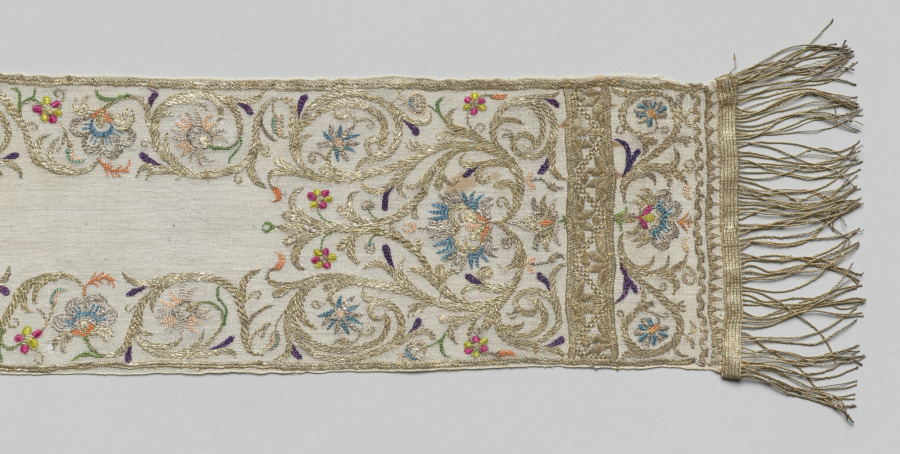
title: Headdress (beniqa)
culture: Africa, North Africa, Algeria, Algerian embroiderer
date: 1800s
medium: Linen, silk, and metal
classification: Embroidery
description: Beniqa were stylish headdresses that women wore when visiting the hammam (steam bath). The linen fabric absorbed the damp from their wet hair. With its gold and silver metal thread, shimmering spangles, and brightly colored threads forming flowers and vines, this beniqa was a ceremonial garment worn for the ritual bath before a Jewish woman’s wedding; it was also part of her dowry. After toweling off her hair, a woman made two braids, which she would then twist into the cap’s fabric and tie on her head, with the gold-fringed ends trailing down.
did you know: Slender gray lines made in pencil or chalk trace out unstitched designs on this elaborate ritual cap.